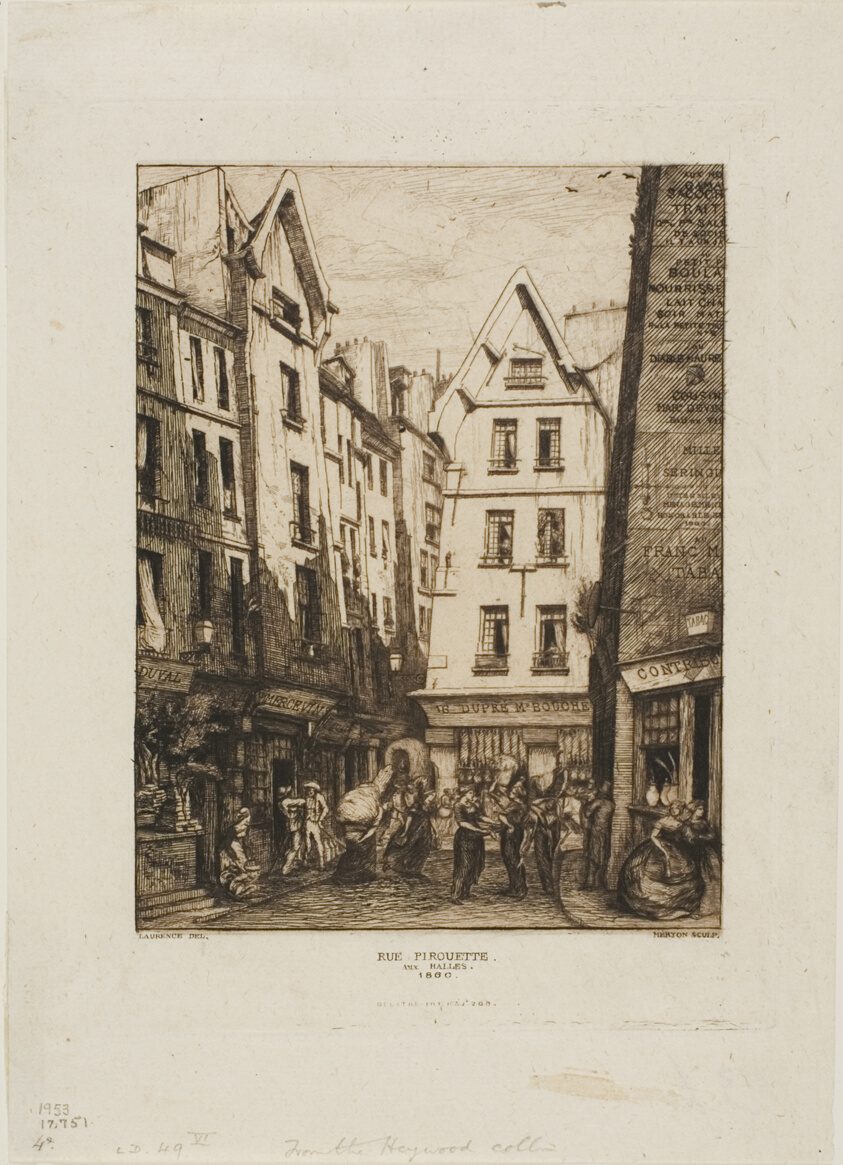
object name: Print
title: Rue Pirouette aux Halles, Paris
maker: Charles Meryon (French, 1821-1868); printed by Auguste Delâtre (French, 1822-1907); after Louis-Marie Laurence (French, 1811-1886)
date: 1860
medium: Etching and drypoint in warm black on ivory laid paper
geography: France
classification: etching; print; prints and drawing